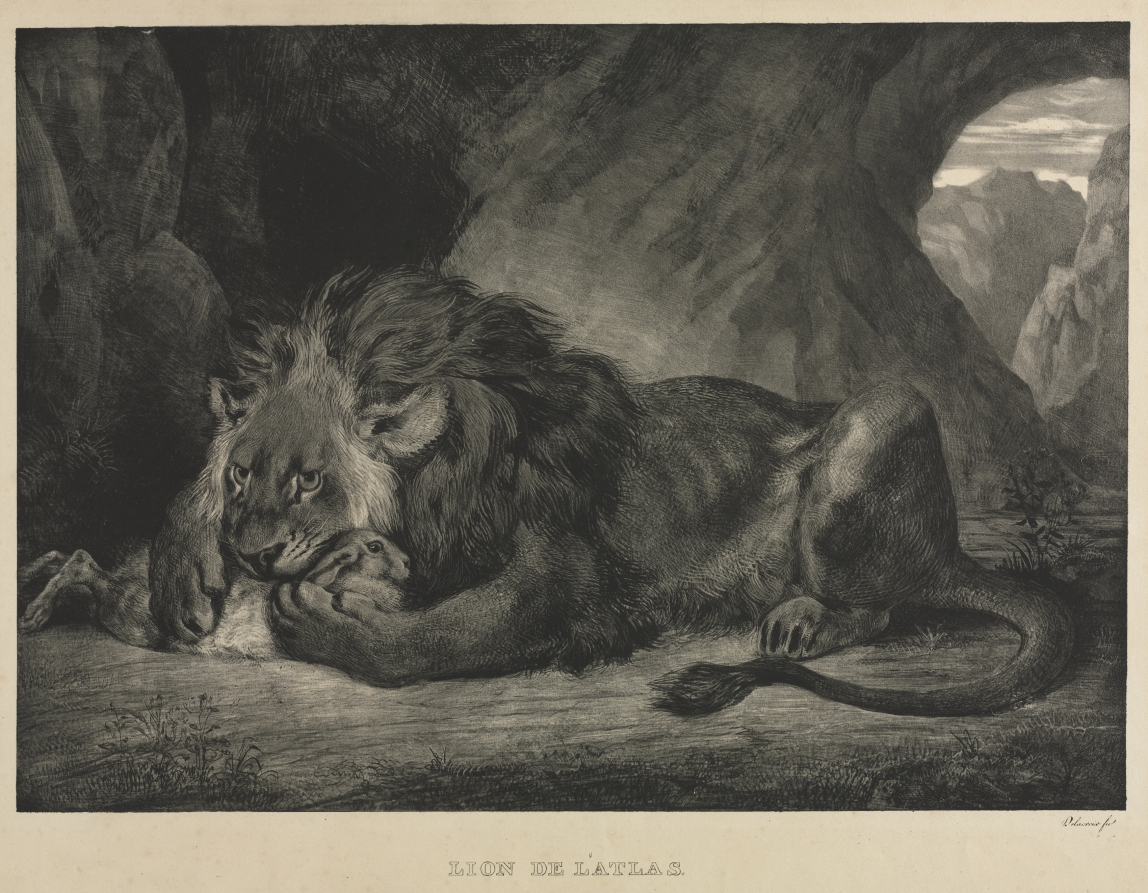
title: Lion of the Atlas Mountains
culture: France, 19th century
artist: Eugène Delacroix (French, 1798–1863)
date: 1829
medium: lithograph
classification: Print